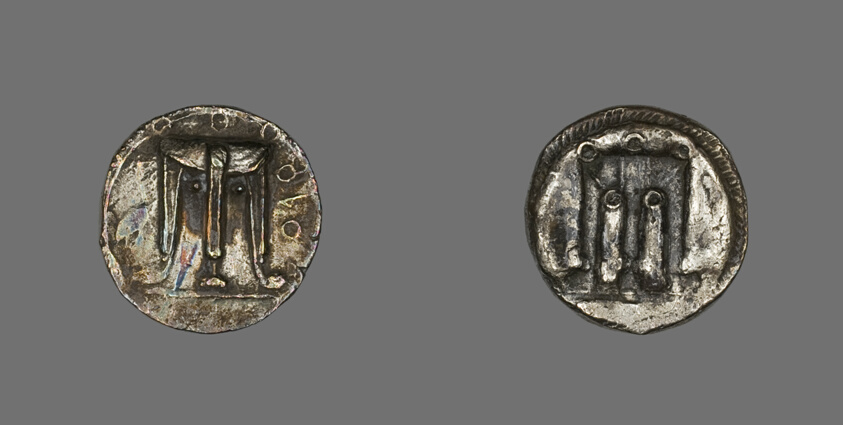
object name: Coin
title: Stater (Coin) Depicting a Tripod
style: archaic (greek), ancient, greek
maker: Greek; Crotone, Italy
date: 500-480 BCE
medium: Silver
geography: Crotone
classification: coin; ancient art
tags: vessels